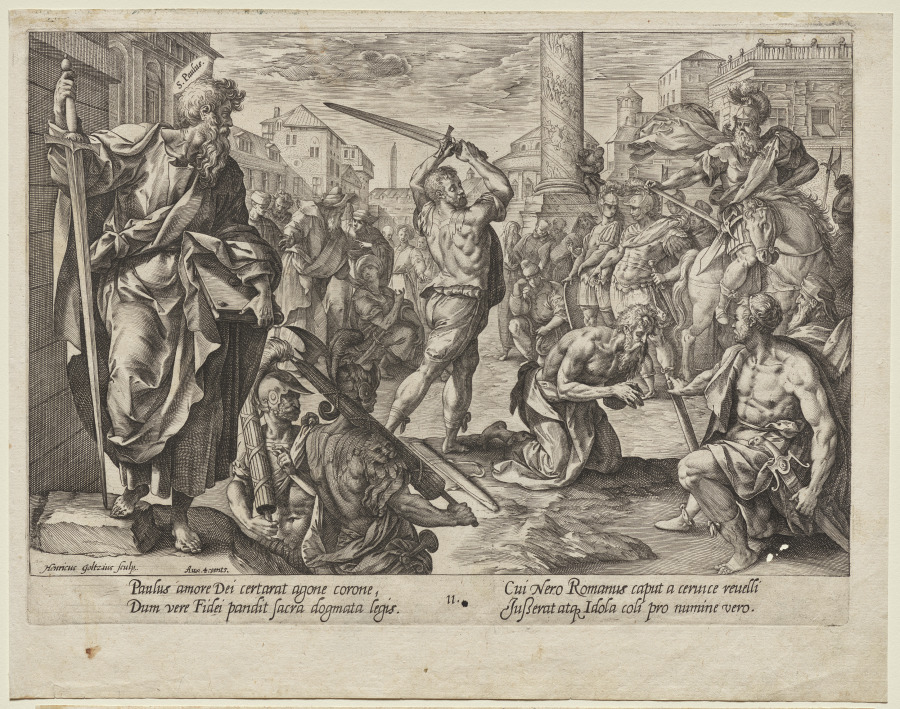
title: St. Paul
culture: Netherlands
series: Christ, St. Paul, and the Twelve Apostles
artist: Hendrick Goltzius (Dutch, 1558–1617)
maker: after Maarten de Vos (Flemish, 1532–1603)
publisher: Aux Quatre Vents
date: c. 1578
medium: engraving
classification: Print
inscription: Henricus Goltzius sculp. and Aux.4.vents, bottom left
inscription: Verses in lower margin: Paulus amore Dei certarat agone corone,…numine vero. In nimbus S. Paulus. Numbered 11